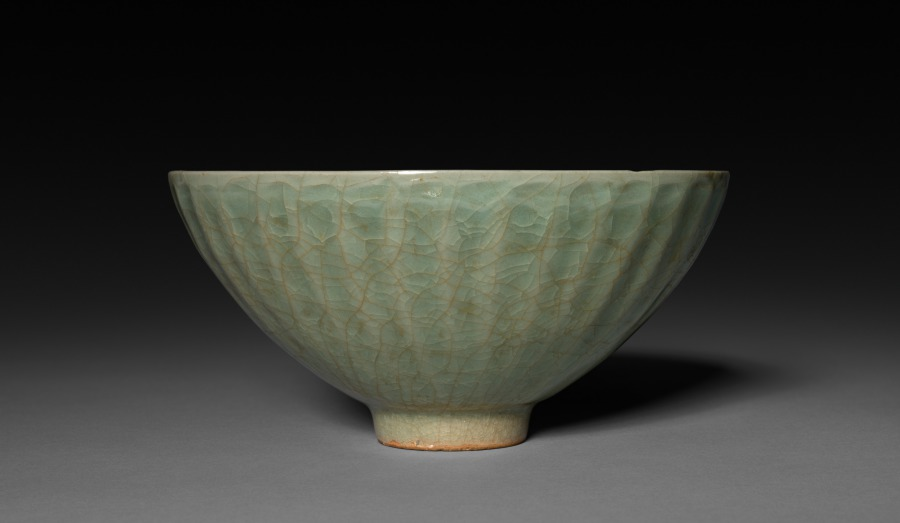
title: Bowl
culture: China, Southern Song dynasty (1127-1279)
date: 1200s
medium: glazed buff stoneware, Southern Celadon ware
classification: Ceramic